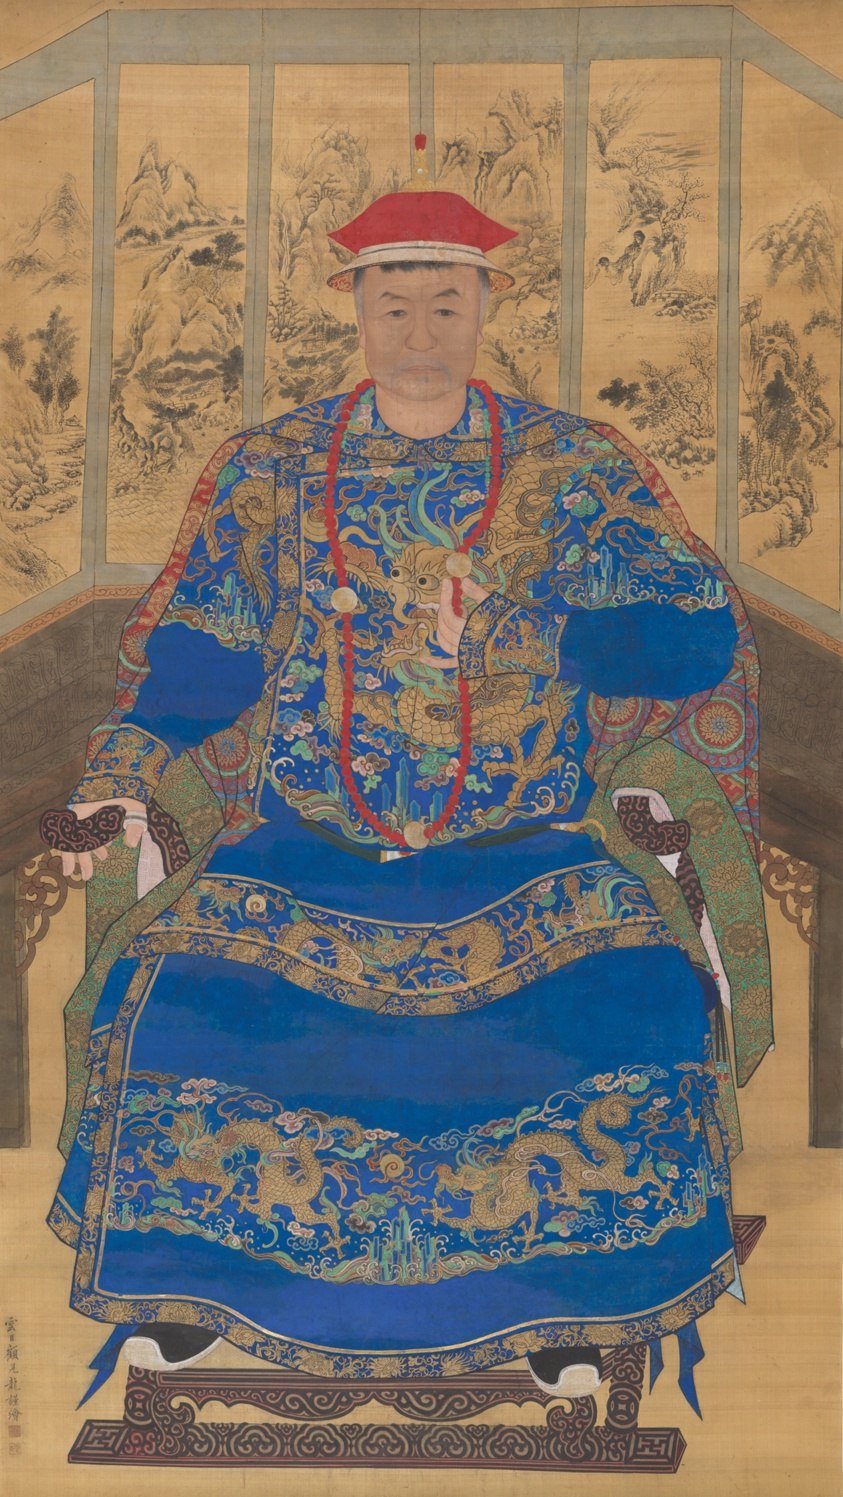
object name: Painting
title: Portrait of a Manchu Prince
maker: Gu Jianlong (Chinese, 1606-1691)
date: Qing dynasty (1644-1911), 17th century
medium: Hanging scroll; ink and color on silk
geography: China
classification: painting